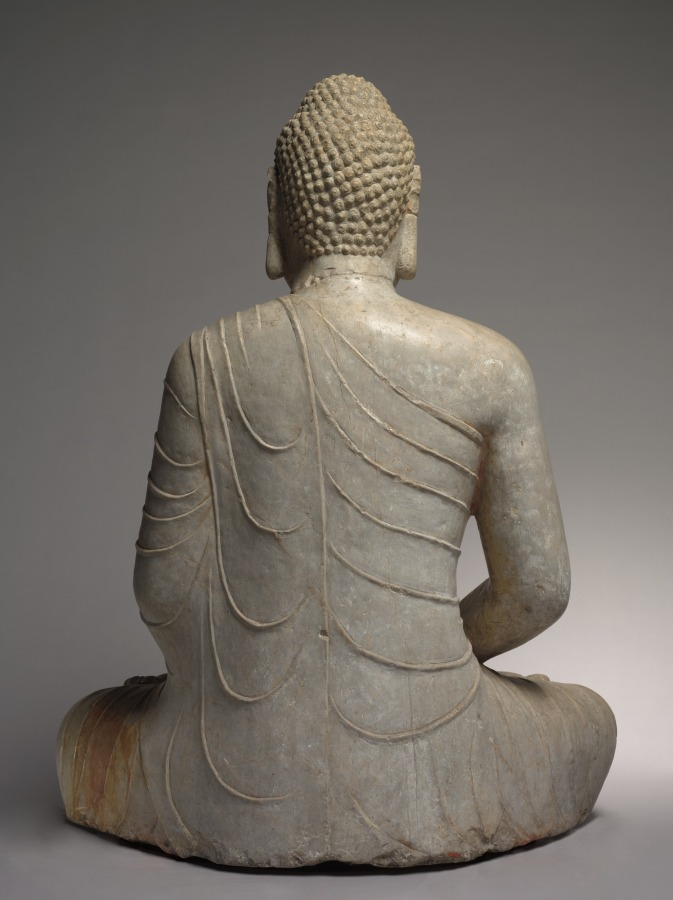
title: Seated Amitayus Buddha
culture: China, Northern Qi dynasty (550-577)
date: c. 570s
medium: marble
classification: Sculpture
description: Amitayus, the Buddha of Infinite Life, is seated in meditation on a double lotus pedestal. The pedestal was not made with the statue but the combination is faithful to the original artistic conception. The statue is an extremely rare example of a major type of Northern Qi Buddhist sculpture. The heavy, massive front highlights the sense of monumentality and the spiritual essence of the Buddha. Today the sculpture is united with a pedestal that exhibits the rich, ornate style of early Tang sculpture. It was commissioned by the Duke of Liang, Fang Xuanling (578–648), for the blessing of his second son and daughter-in-law, the Tang imperial princess of Gaoyang. The iconography and inscription suggest that it originally went with a statue, now missing, of Shakyamuni, the historical Buddha, instead of Amitayus.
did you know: The stringlike folds of the Buddha's draperies emphasize his monumental, rigidly erect torso and tubular limbs.